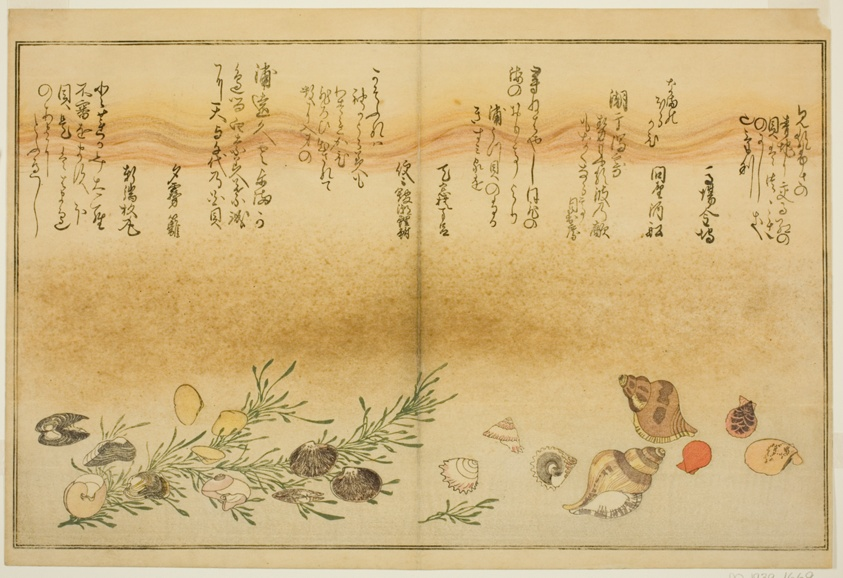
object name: Print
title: Beni-gai, hora-gai, urauzu-gai, wasure-gai, chiyonohana-gai, and masuho-gai, from the illustrated book "Gifts from the Ebb Tide (Shiohi no tsuto)"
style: Japanese (culture or style)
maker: Kitagawa Utamaro 喜多川 歌麿; Japanese, 1753 (?)-1806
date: 1789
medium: Color woodblock print; double-page illustration from book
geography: Japan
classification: woodblock print; print; asian art